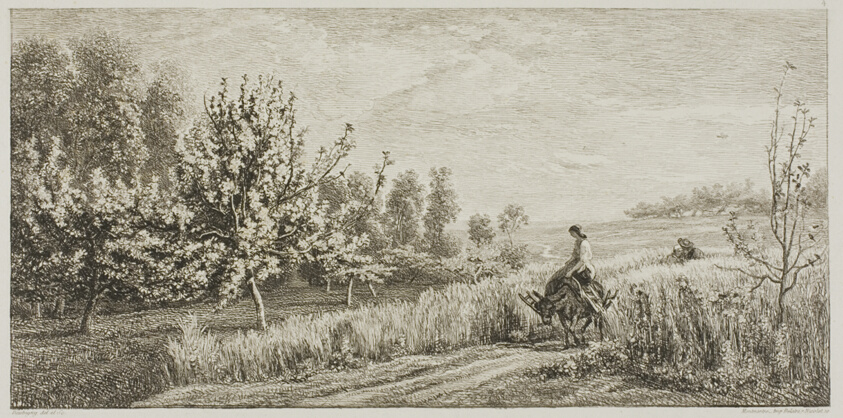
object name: Print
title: Spring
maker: Charles François Daubigny (French, 1817-1878)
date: 1857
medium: Etching and drypoint on light gray chine laid down on white wove paper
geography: France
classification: etching; print; prints and drawing